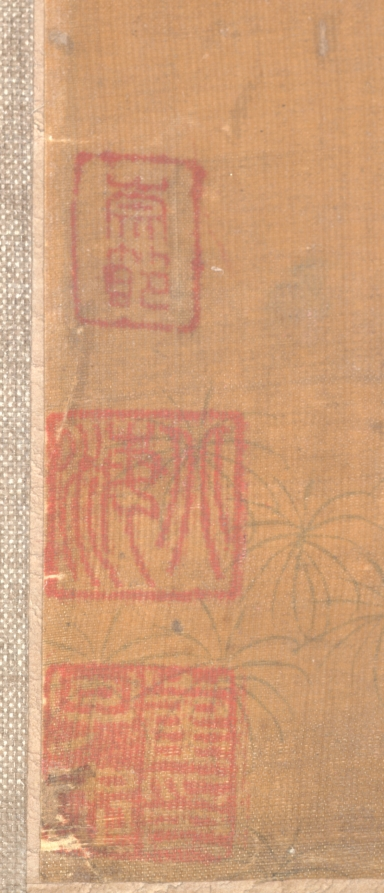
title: Xu Jingyang Moving His Family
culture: China, Ming dynasty (1368–1644)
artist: Cui Zizhong (Chinese, 1574–1644)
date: 1644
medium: Hanging scroll; ink and color on silk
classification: Painting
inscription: Artist's 2 seals: Pei-hai, Cui Zizhong yin.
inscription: 9 additional seals: 2 of Xiang Yuan (18th-19th c.); 1 of Tang Zuomei (late 18th-19th c.); 1 of Zhang Heng 張珩 (1915-1963); 1 of C. C. Wang 王季遷 (1907–2003); 4 unidentified.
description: Xu Jingyang was a dedicated fourth-century Confucian official who allegedly turned into a Daoist immortal. This scroll depicts the legend that when he attained immortality, he took his entire household, including chickens and dogs, to paradise. Cui Zizhong’s painting style intentionally referenced ancient masters. Typical of the pre-Song dynasty landscape tradition, there is the use of blue and green colors and an emphasis on outline rather than texture. While the trembling outlines are reminiscent of earlier painters, the flickering light on rocks and trees is a stylistic feature of Cui’s own time.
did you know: Xu Jingyang, wearing red, is in the upper register of figures, while below his servants transport a rooster, dog, and other supplies.